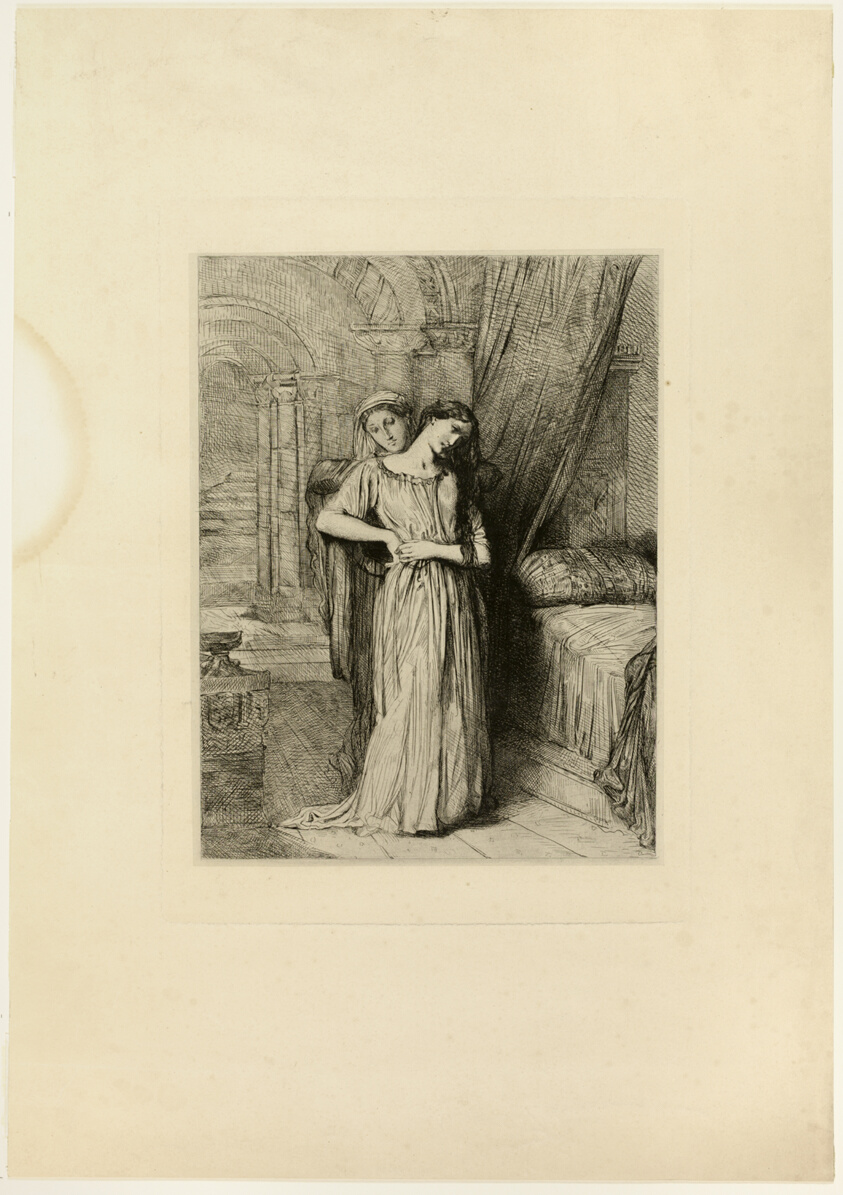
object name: Print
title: If I Do Die Before Thee, plate eight from Othello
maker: Théodore Chassériau (French, 1819-1856)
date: 1844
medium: Etching, engraving and drypoint on off-white China paper, laid down on cream wove paper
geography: France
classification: etching; print; prints and drawing